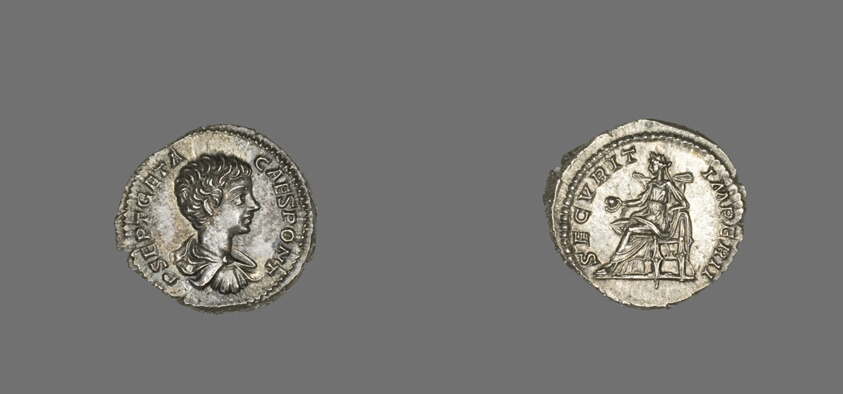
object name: Coin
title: Denarius (Coin) Portraying Emperor Geta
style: imperial (roman), roman (ancient, style or period)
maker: Roman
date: 199-204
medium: Silver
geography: Rome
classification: coin; ancient art